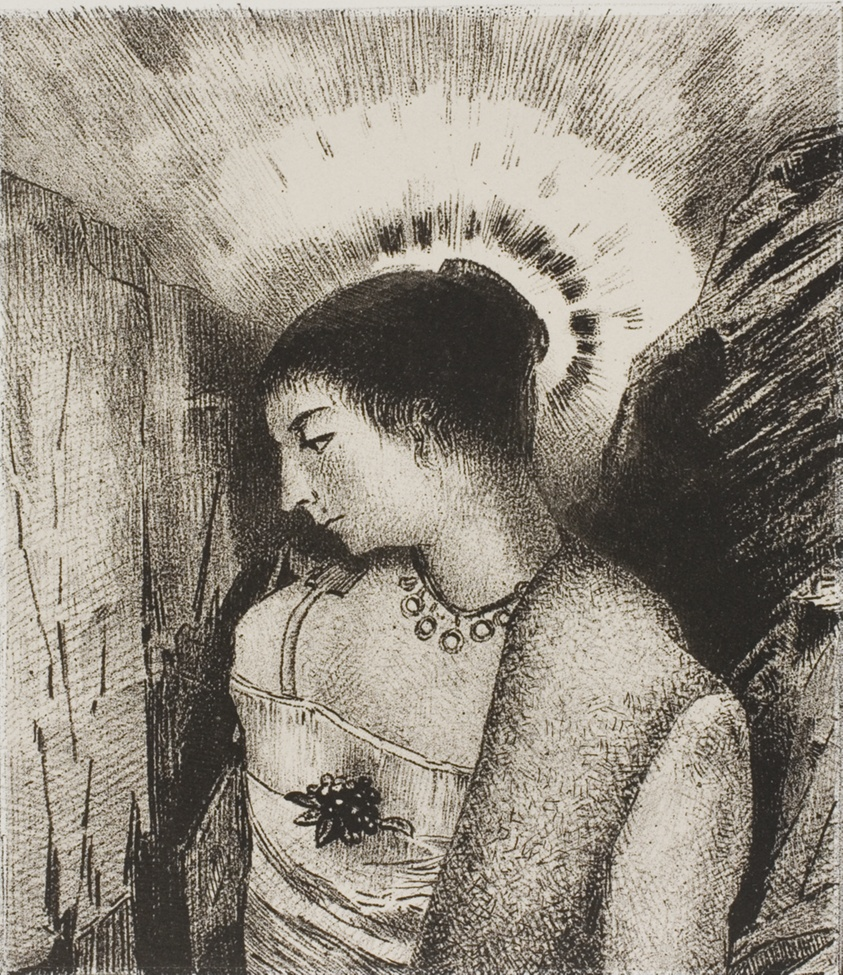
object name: Print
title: Here is the Good Goddess, the Idaean Mother of the Mountains, plate 15 of 24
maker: Odilon Redon (French, 1840-1916)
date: 1896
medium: Lithograph in black on ivory China paper laid down on heavy ivory wove paper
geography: France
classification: lithograph; print; prints and drawing; paper